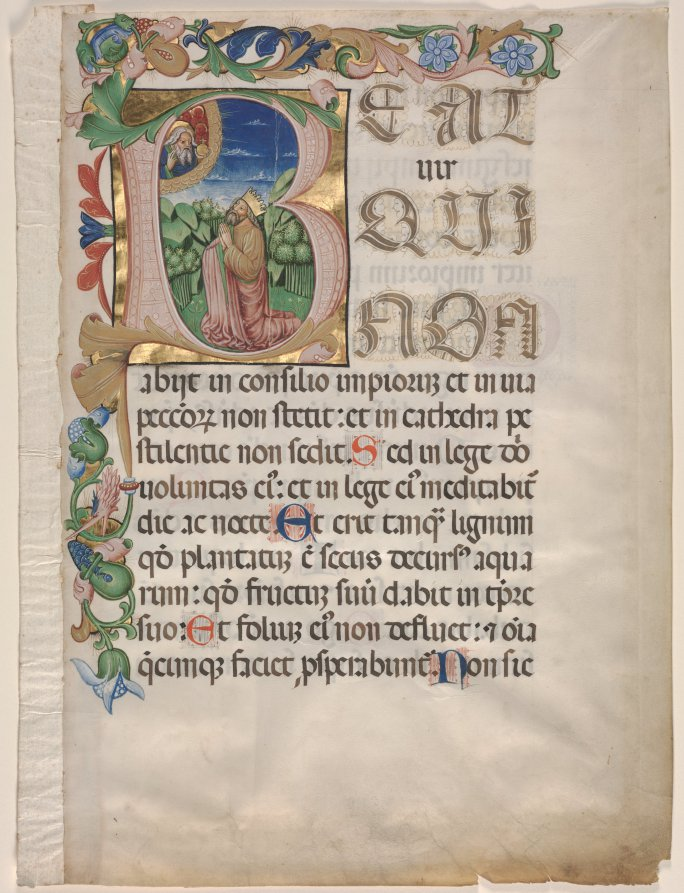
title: Leaf from a Choir Psalter: Initial B with King David in Prayer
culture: Northern Italy, Lombardy and the Veneto, 15th century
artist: Maestro del Messale Barbo (Italian)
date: c. 1460–1470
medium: ink, tempera and gold on vellum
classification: Manuscript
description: Psalters contained all 150 biblical psalms. Specific pages within the psalter were decorated with historiated initials to highlight the liturgical divisions. In addition to providing embellishment, such initials served as a visual aid to the user to assist in locating a text. The most prominent of these was Psalm 1, which begins Beatus vir qui non abiit in consilio impiorum (Blessed is the man who has not walked in the counsel of the ungodly), and which traditionally featured the grandest initial of all. An enlarged B was customarily filled with a scene representing King David, the author of the Psalms. Here David kneels in prayer within a bright green landscape of craggy rocks and trees. Above, God the Father, with orb in hand, looks down from heaven as he blesses David with his right hand. The author of the initial is named after a missal he illuminated for Marco Barbo, Bishop of Treviso, from 1455 to 1464 (now in Padua). He worked mainly in Lombardy and the Veneto during the 1450s and 1460s, and manuscripts illuminated by him are known to have been destined for patrons in Brescia and Padua.